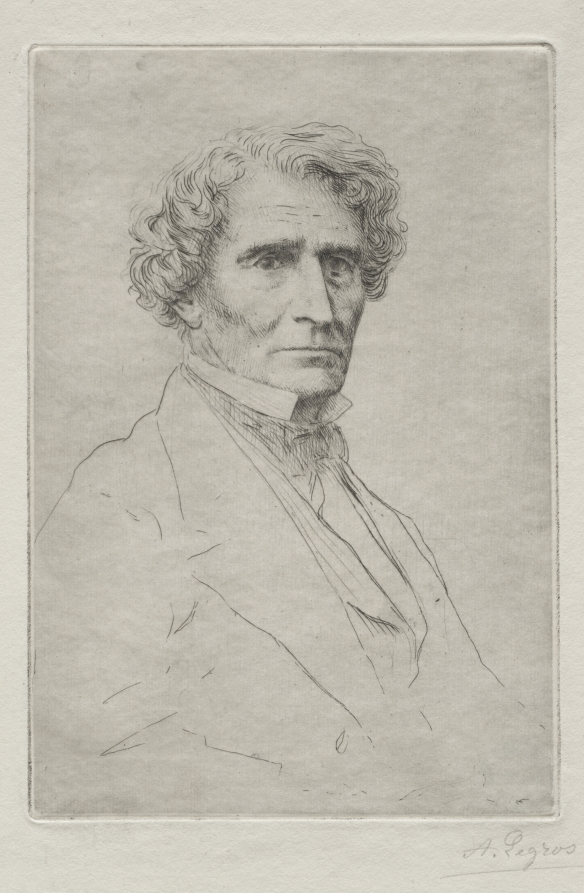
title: Hector Berlioz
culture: France, 19th century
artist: Alphonse Legros (French, 1837–1911)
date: c. 1857–1911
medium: drypoint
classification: Print